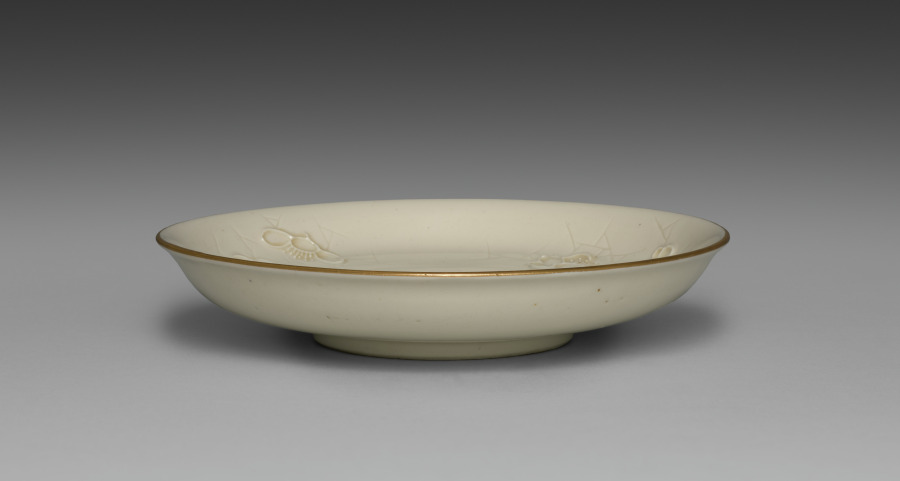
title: Medium-sized Dish from Dining Set with Plum Blossoms and Cracked-Ice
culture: Japan, Meiji period (1868–1912)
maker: Seifū Yohei II (Japanese, 1844–1878)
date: c. 1875–78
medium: Porcelain with molded designs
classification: Ceramic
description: Each item in this set has a delicate low-relief design of flowering plum branches over scattered, intersecting lines meant to resemble the cracked-ice surface of a frozen body of water and is signed on the base in gold pigment. While Yohei II produced many fine works in underglaze blue, like those produced by Kiyomizu Shichibei, he also made works in quite different styles later in his career, from the early 1870 s. In 1873, he was appointed purveyor to the Industrial Center of Kyoto Prefecture, a designation associated with Kyoto’s efforts to reach an international market through the port of Kobe; and from 1875 until his death, he was involved in national-level projects to present Japanese ceramics across the world. It was during this period that Yohei III was apprenticed to Yohei II, and it has been suggested that this set may in fact be an early example of Yohei III’s work, which he signed with his teacher’s name. Decorated with flowers resembling Japanese textile motifs, the set calls to mind the design of Yohei II’s pair of vases with plum blossoms in the Victoria and Albert Museum. Here, the elaborate trees created for a formal public exhibition setting have been translated into the approachable blossoms of the genteel domestic environment. While the designs are consistent across the pieces, each raised flower petal and pistil and each incised line in the ice was done by hand, so the cups, bowls, and dishes are similar yet unique. The bottoms of two boxes once identified the set’s owner, but the information has been deliberately obscured with black ink. However, inscriptions still visible appear to indicate two occasions, once at the end of July 1886 , and once again in June 1916 , when parts of the set were requested from Hokura in Niigata Prefecture. The location corresponds to a neighborhood in the present-day city of Jōetsu. The surname Tsuji 辻 also appears on a paper tag affixed to one of the box cloths. Future research may possibly reveal more about their provenance. A vase by Yohei III in a private collection combines the formal grandeur of the Yohei II vases in the Victoria and Albert Museum with the gentler design of this dining set, placing flowering plum trees against soft, scalloped-edge clouds resembling those in golden screens.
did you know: The dining wares have a creamy white coloration that the four boxes containing them identify as Korean in style.